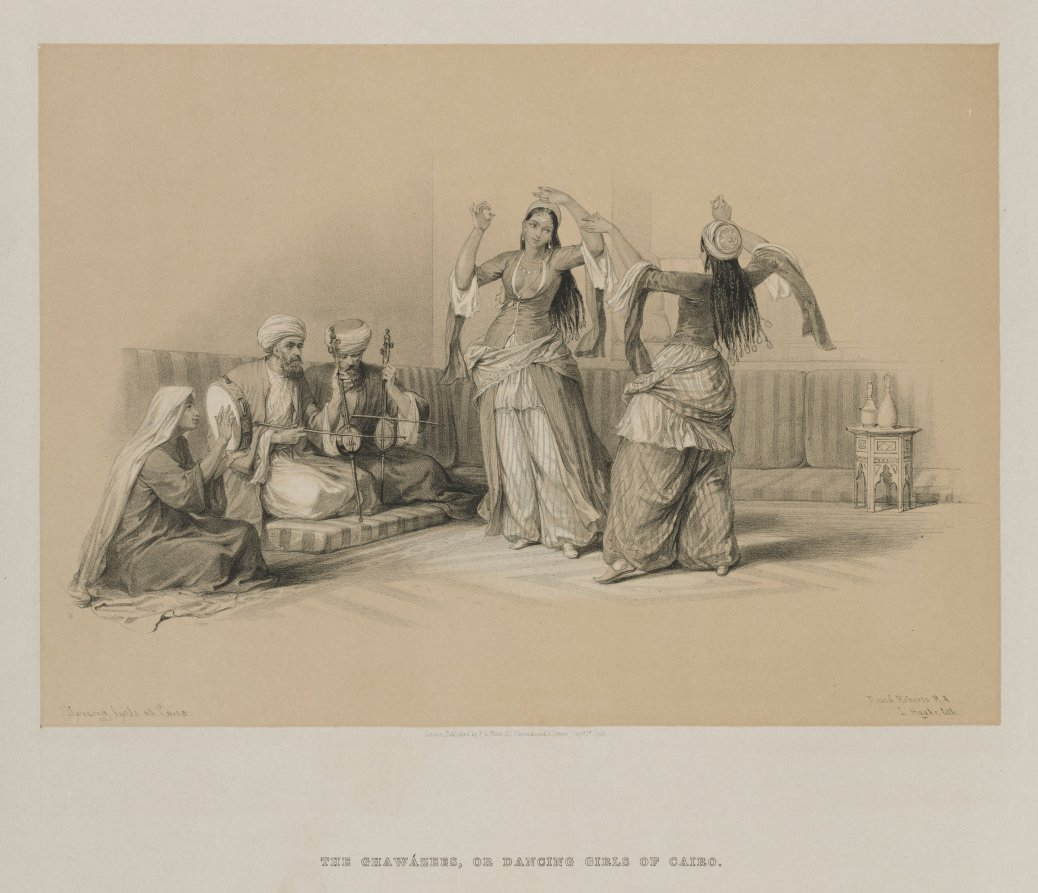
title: Egypt and Nubia, Volume III: Dancing Girls at Cairo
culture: England, 19th century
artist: Louis Haghe (British, 1806–1885)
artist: after David Roberts (Scottish, 1796–1864)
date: 1849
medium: color lithograph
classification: Print